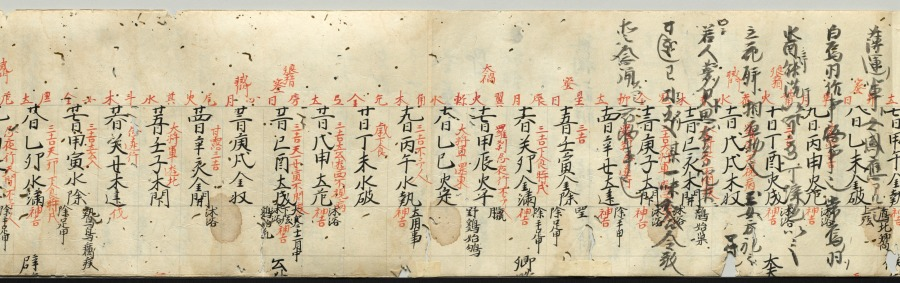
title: Scroll of Miscellaneous Notes written on a Calendar by Priest Seigen (verso)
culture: Japan, Kamakura period (1185–1333)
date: c. 1200–1231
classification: Manuscript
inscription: bears miscellaneous notes written by Priest Seigen.